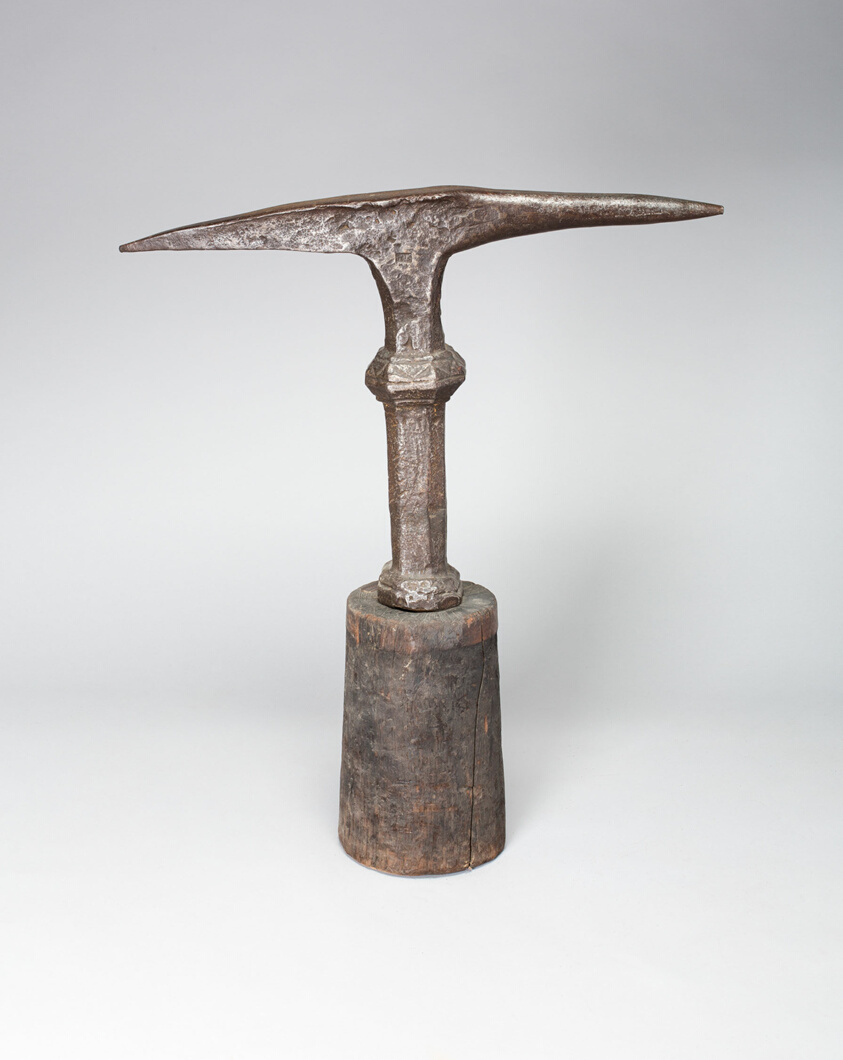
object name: Arms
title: Bickom (Anvil)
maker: European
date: 15th century (?)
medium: Iron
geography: Europe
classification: arms and armor, miscellaneous; arms and armor; arms